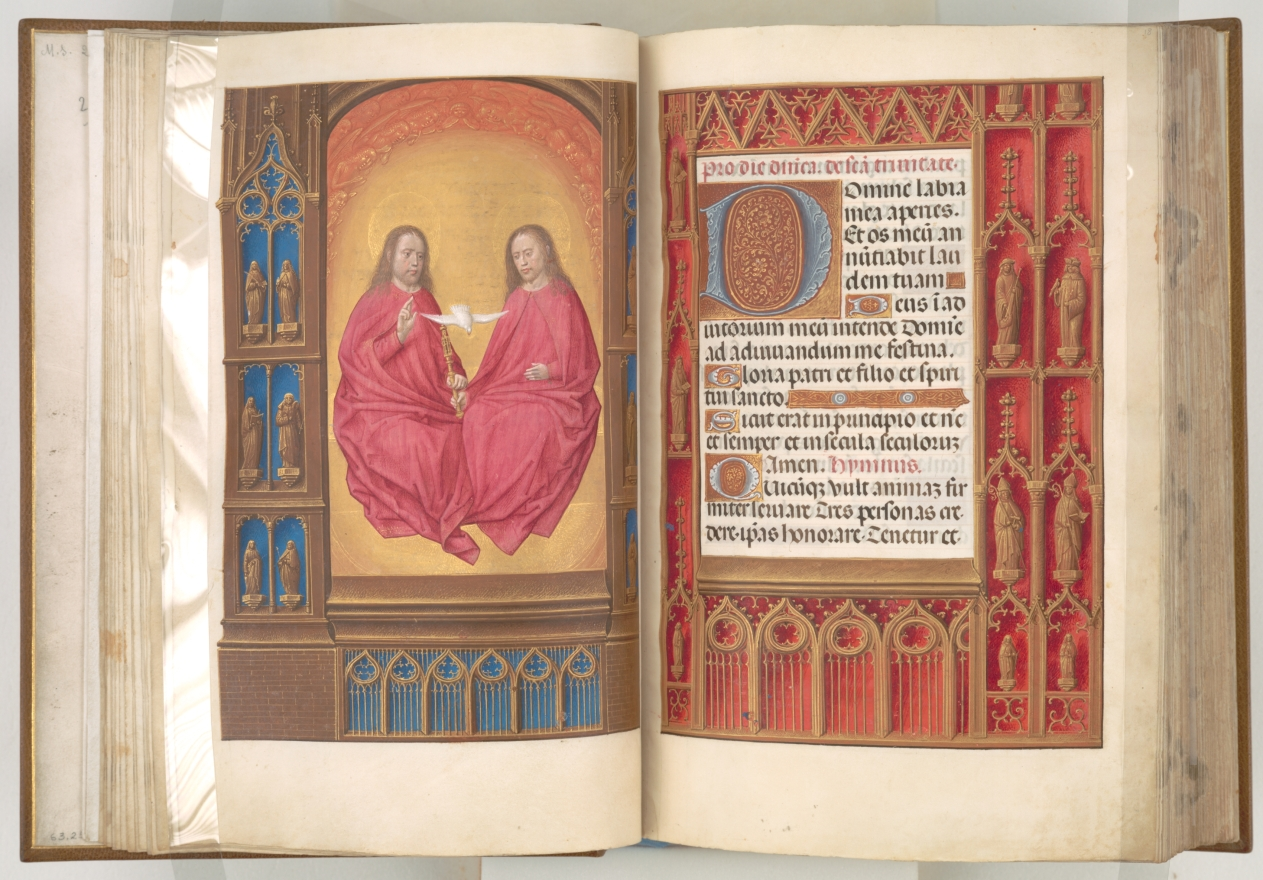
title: Hours of Queen Isabella the Catholic, Queen of Spain: Fol. 18r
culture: Flanders, Ghent and Bruges, late 15th century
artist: Master of the First Prayerbook of Maximillian (Flemish, c. 1444–1519)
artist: and Associates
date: c. 1500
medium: ink, tempera, and gold on vellum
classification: Bound Volume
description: This manuscript was illuminated by a circle of at least five highly organized manuscript painters active in the Flemish cities of Ghent and Bruges. The principal illuminator was Alexander Bening, who painted the majority of the book's miniatures. Manuscripts produced by this circle of artists are renowned for the decoration of their borders, which typically feature a rich variety of realistically-painted flowers, birds, and butterflies. This prayer book, called a book of hours, was intended not for a cleric, but for the private devotions of a lay person-in this case, Isabella the Catholic, Queen of Spain (1451-1504). Isabella's coat of arms embellishes the book's frontispiece. It is unlikely that the book was commissioned by the Queen herself; rather, she probably received it as a diplomatic gift from someone courting her patronage, perhaps Cardinal Francisco Jimenez de Cisneros. A Franciscan friar, Jimenez was dependent upon Isabella for his advancement, first to the post of Queen's confessor in 1492, and then to Archbishop of Toledo in 1495.